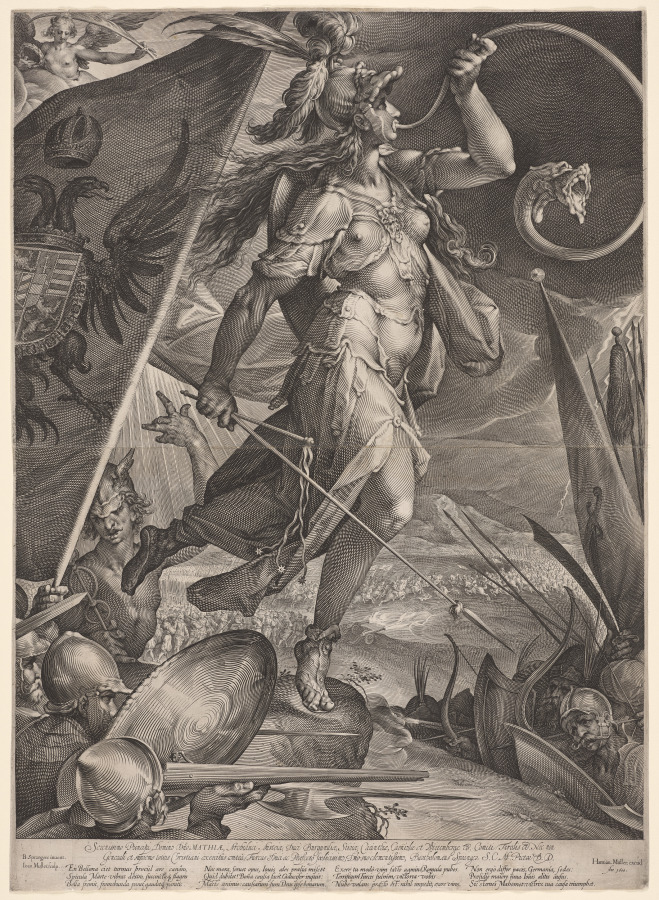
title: Bellona Leading the Armies of the Emperor against the Turks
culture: Netherlands, early 17th Century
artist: Jan Muller (Dutch, 1571–1628)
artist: after Bartholomaeus Spranger (Flemish, 1546–1611)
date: 1600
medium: engraving (printed from two plates)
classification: Print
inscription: lower left, in plate: B. Sprangers invent. / Ioan.Muller.sculp. ; across bottom, in plate: Serenissimo Principi Domino D[n?]o MATHIÆ, Archiduci Austriæ, Duci Burgundiæ, Stiriæ, Carinthiæ, Carniolæ et Wirtembergæ etc. Comiti Tirolis etc. Nec non / Generali et supremo totius Christiani exercitûs contrà Turcas Duci ac Præfecto foelicissimo, D{n?]o suo clementissimo, Bartholomæus Spranger. S.C.M.Pictor D.S. [in engraved script] ; across bottom, in plate: En Bellona ciet turmas procùl ære canôro, / Spicula Marte vibrat dextro, succinctaque flagris / Bella fremit, fremebunda parat, gaudetque paratis. / Nec mora, feruet opus, Iouis ales prælia miscet / Quid dubitet? Bona caussa facit. Caducifer inquit: / Macte animis: caussarum sum Deus ipse bonarum. / Exere tu modò vim facto agmine, Romula pubes. / Terrificum Turcis fulmen, victoria vobis / Nube volans præsto est: nihil impedit, exere vires. / Non ergò differ pacis, Germania, sedes: / Præsidio maiore iuua Iouis alitis ausus. / Sic sternes Mahomet: victrix tua causa triumphet. ; lower right, in plate: Harman. Muller. excud. / Anº 1600. ; VERSO, lower left, in graphite: 78) ; lower right, in graphite: 289/75 ; lower right, in graphite: H 50 I/II ; lower right, in graphite: l- ; lower right, in graphite: 34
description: The central, striding figure, Bellona (the Roman goddess of war), is said to be either the sister or the wife of Mars, god of war. The double-headed eagle of the Habsburgs appears on the flag behind her. Born in Amsterdam, Jan Muller probably learned engraving from his father, Harman Muller, a printmaker and publisher. He traveled to Italy in the 1590s and presumably stopped in Prague along the way. There he made prints based on designs by artists employed at the Habsburg court, including Bartholomeaus Spranger (1546–1611).